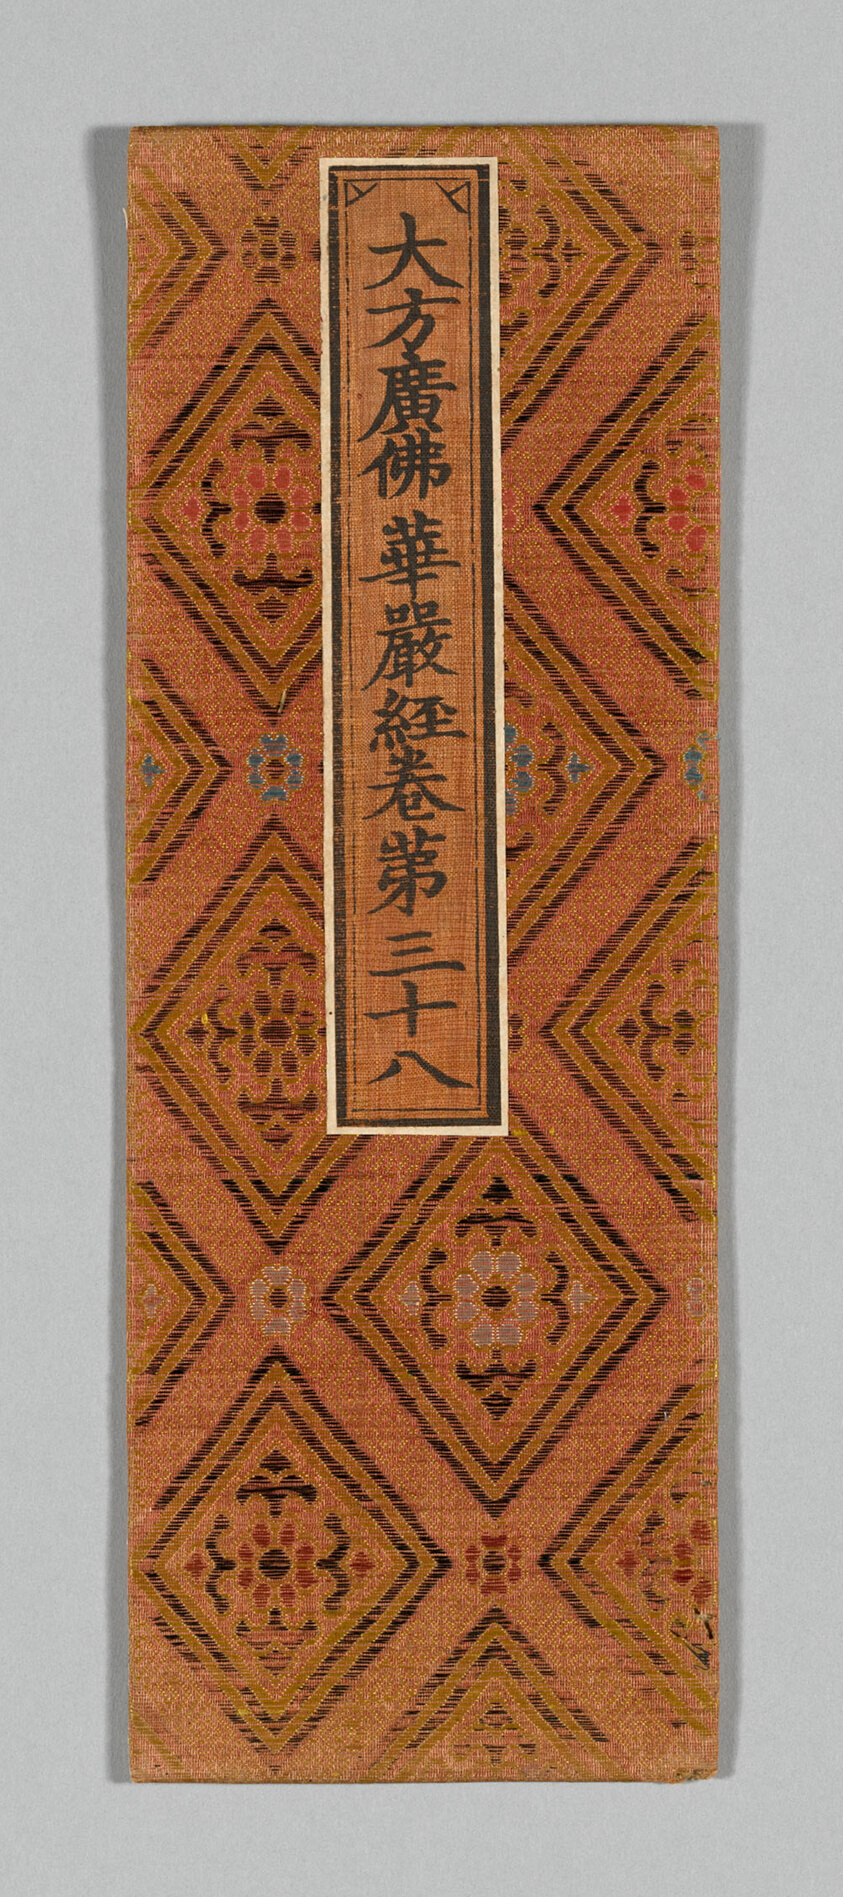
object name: Textile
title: Sutra Cover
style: ming, Chinese (culture or style), East Asian, asian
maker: China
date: Ming dynasty (1368–1644), c. 1590s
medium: Silk and cotton, broken twill weave with patterning wefts; wrapped over cardboard and backed with paper; applied label of silk, plain weave; with inscribed title painted and/or printed with ink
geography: China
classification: textile; weaving